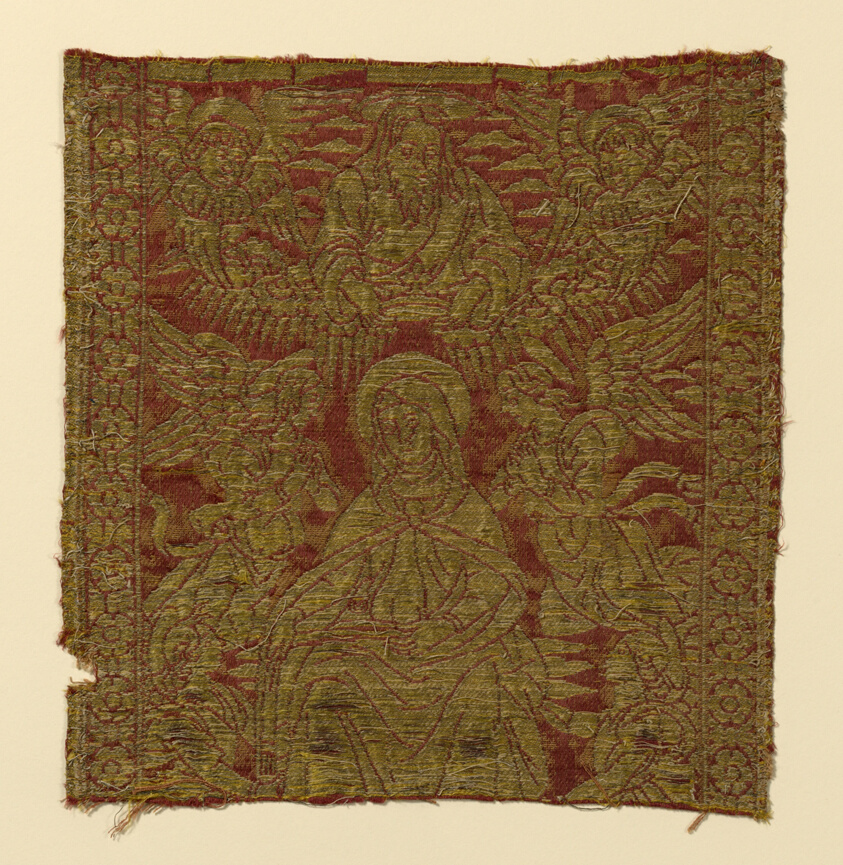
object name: Textile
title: Fragment (From an Orphrey Band)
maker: Italy, Florence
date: 15th century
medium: Silk and gold gilt strip wound around linen fiber core, integrated compound-weave of warp-float faced satin weave and twill weave with supplementary patterning wefts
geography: Florence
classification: textile; weaving; liturgical